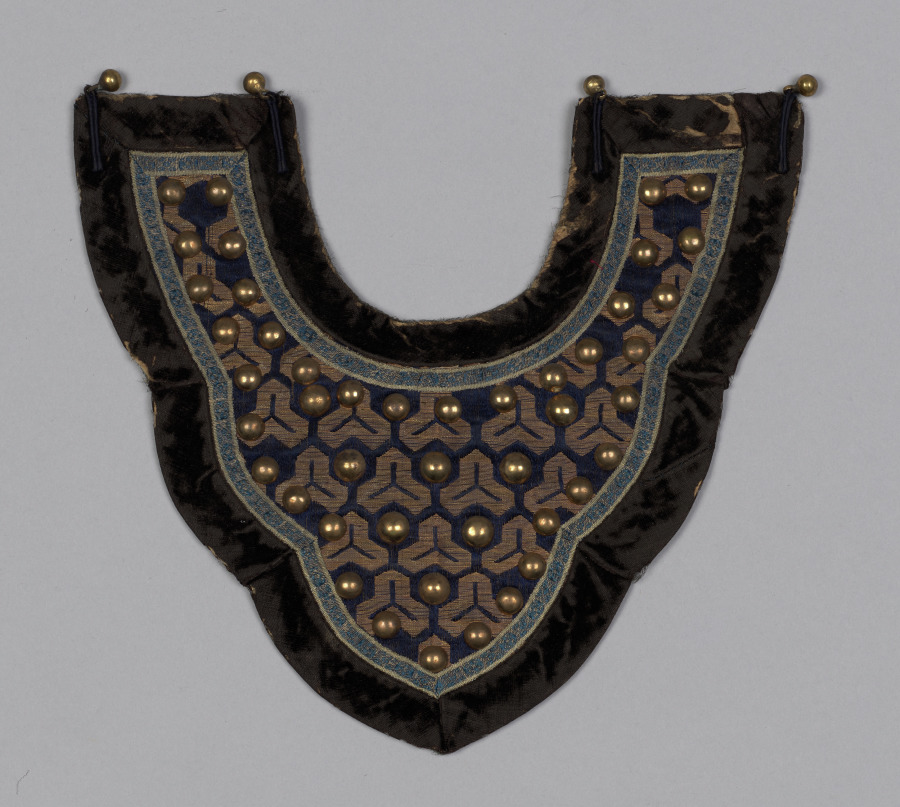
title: Ceremonial Uniform: Armpit Gusset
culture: China, Qing dynasty (1644-1911)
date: 1644–1911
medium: satin weave silk with gold metal thread embroidery; supplementary weft; black velvet; metal (brass?); lined in blue silk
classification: Arms and Armor